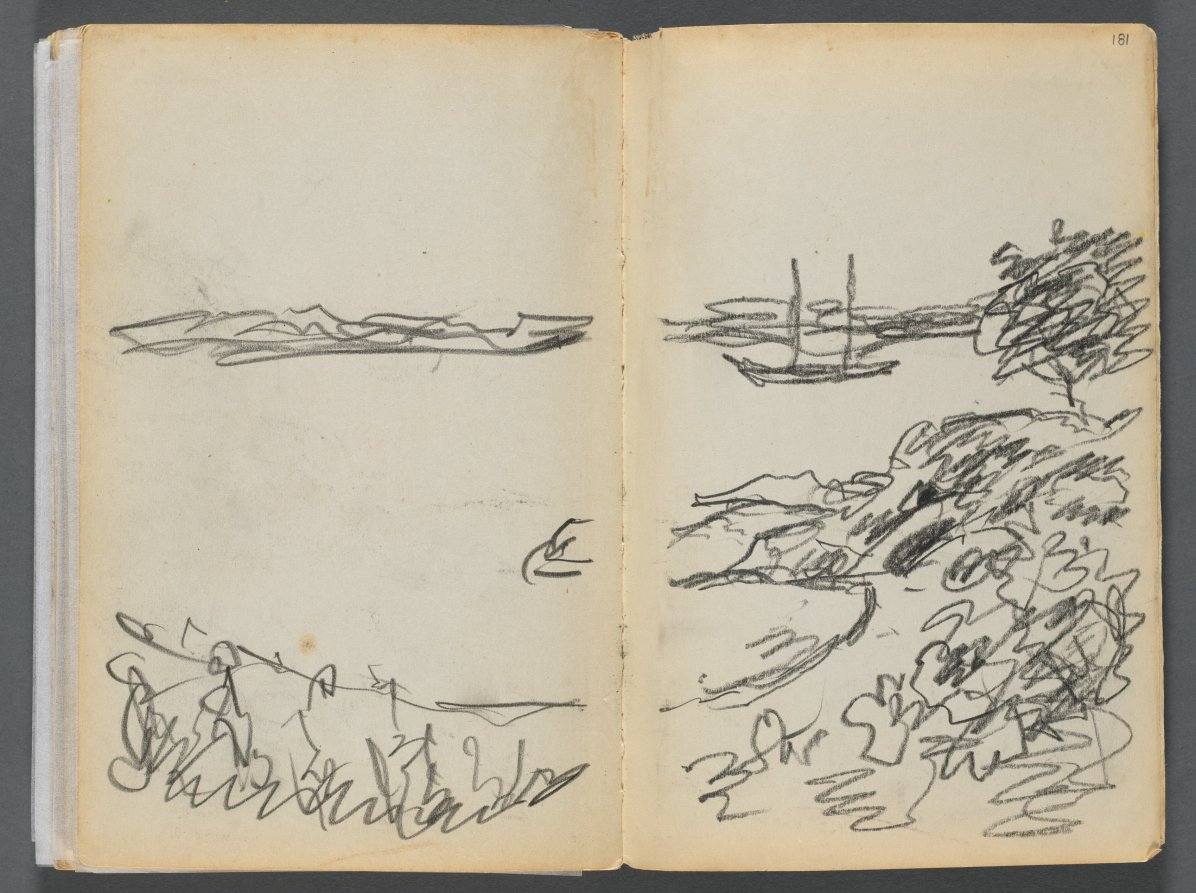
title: Sketchbook- The Granite Shore Hotel, Rockport, page 180 & 181: Shore line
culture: America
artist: Maurice Prendergast (American, born Newfoundland [now Canada], 1858–1924)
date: 1905–10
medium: graphite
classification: Bound Volume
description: This sketchbook contains 72 pages of pencil drawings and 9 watercolors of Cape Ann. On the inside of the cover Prendergast wrote the address of the Granite Shore Hotel in Rockport, Massachusetts.